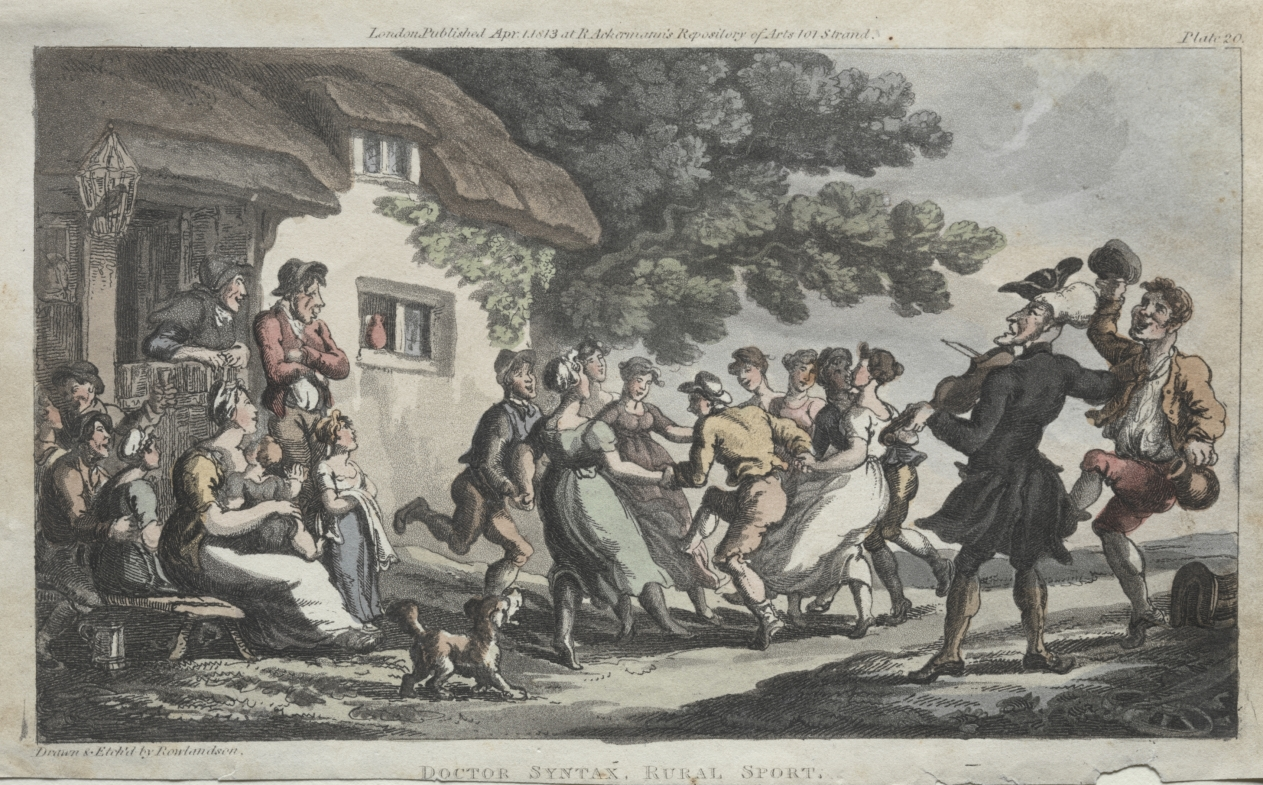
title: The Rev. Dr. Syntax Rural Sport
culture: England, 19th century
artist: Thomas Rowlandson (British, 1756–1827)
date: 1813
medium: etching, hand colored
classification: Print